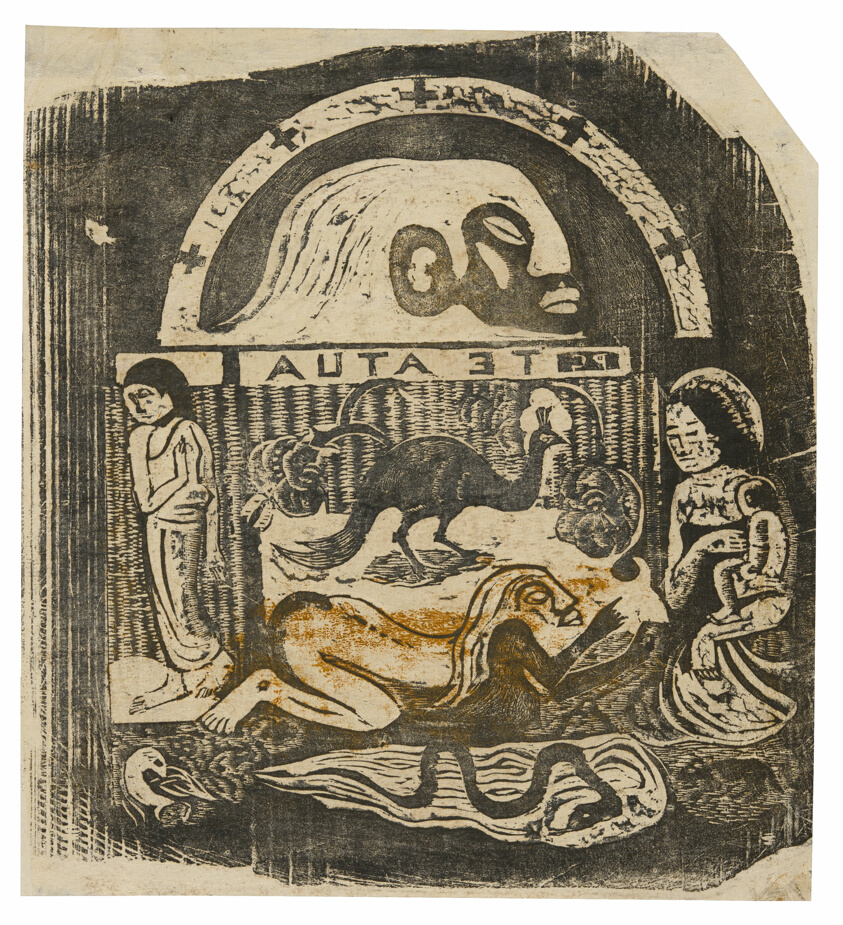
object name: Print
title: Te atua (The God), from the Suite of Late Wood-Block Prints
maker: Paul Gauguin (French, 1848-1903)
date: 1898/99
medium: Wood-block print in black ink, with yellow ocher ink offset, on thin ivory Japanese paper, laid face down on ivory wove paper (recto); wood-block print in brownish-black ink on ivory wove paper (verso)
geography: France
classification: woodcut; print; prints and drawing